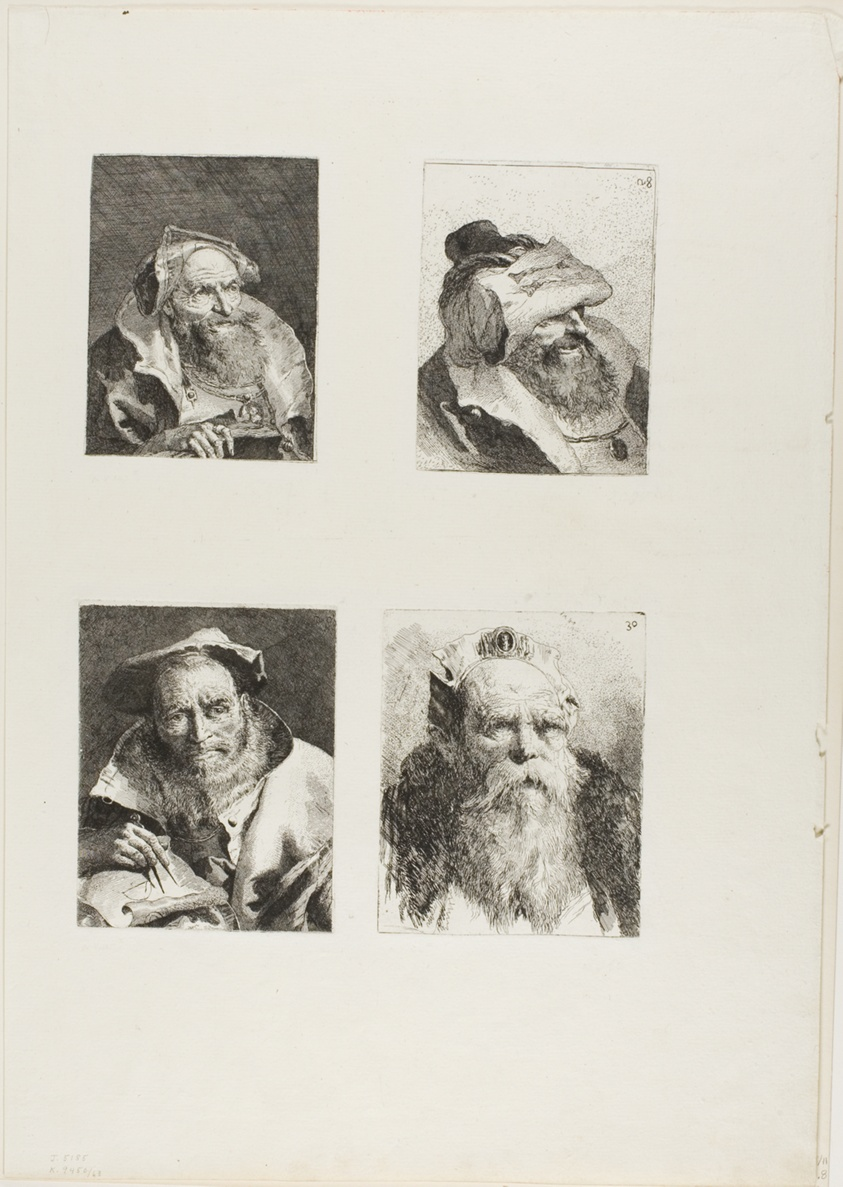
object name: Print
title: Old Man with a Book, Old Man with His Hat on His Forehead, The Mathematician, Old Man with a Beard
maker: Giovanni Domenico Tiepolo (Italian, 1727-1804)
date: 1775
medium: Four etchings on ivory laid paper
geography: Italy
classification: etching; print; prints and drawing